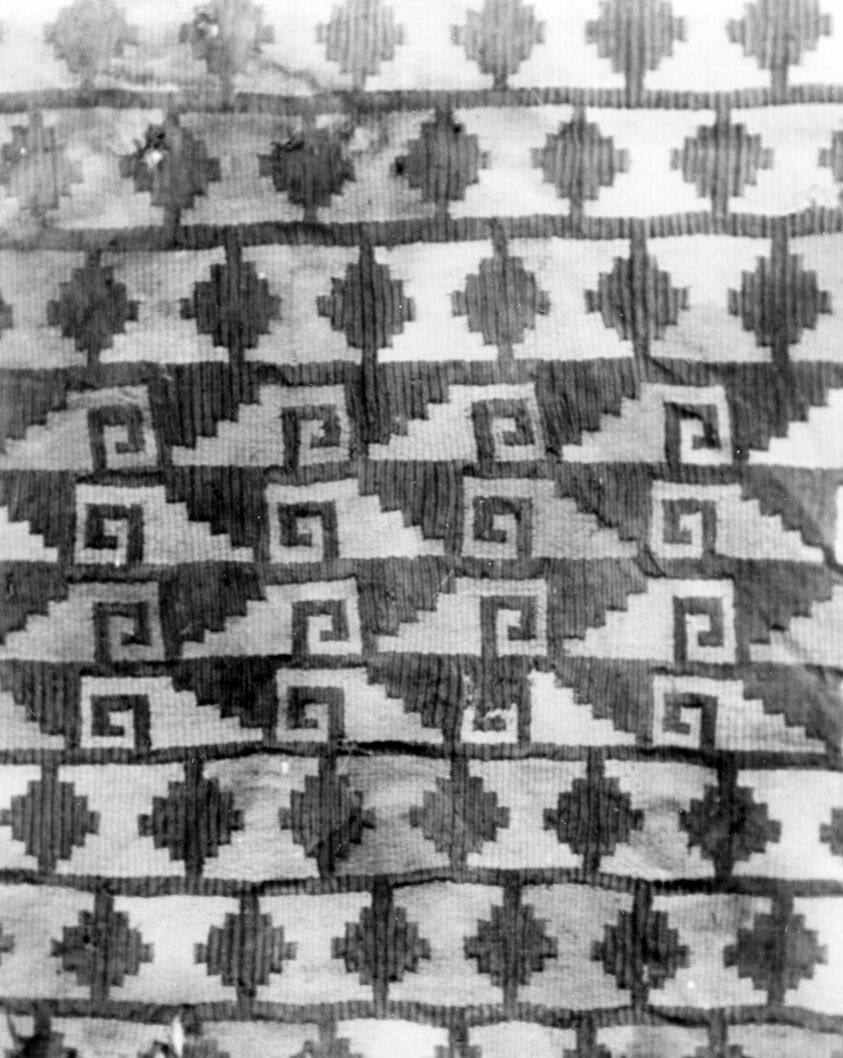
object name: Textile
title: Panel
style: chancay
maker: Peru, Possibly central coast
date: A.D. 1000/1476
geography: Peru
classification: textile; weaving